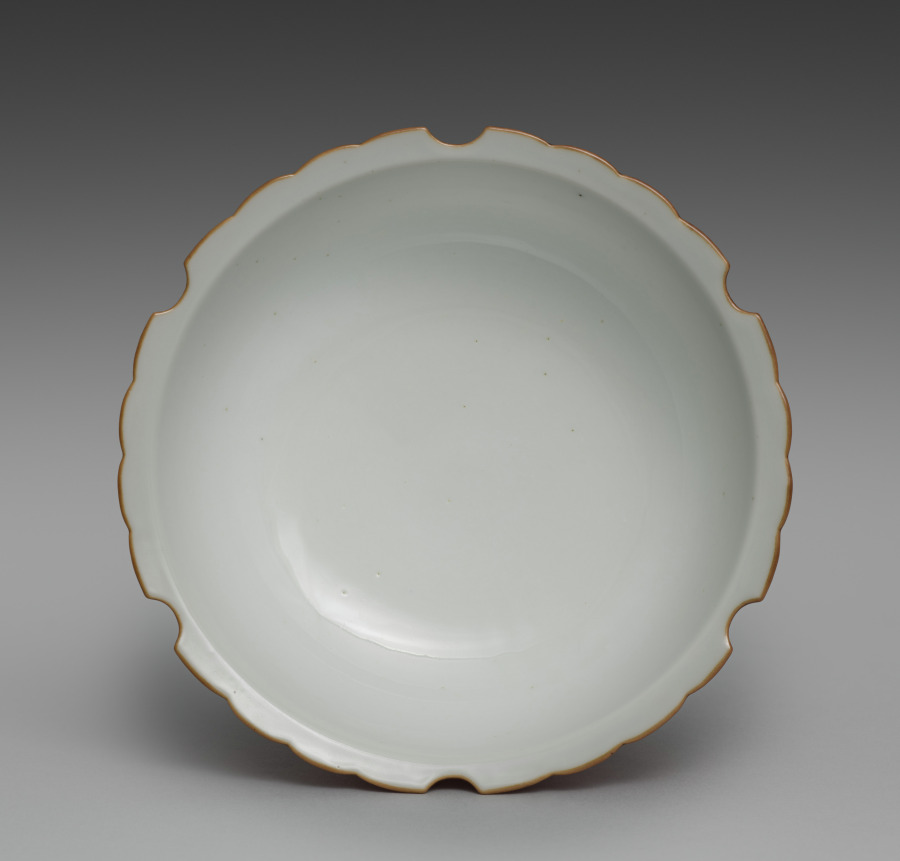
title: Dish from Snow-Flake Side Dishes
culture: Japan, Meiji period (1868–1912)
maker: Seifū Yohei III (Japanese, 1851–1914)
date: 1893–1914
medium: One from a set of six porcelain dishes; porcelain with lobed rims and pink glaze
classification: Ceramic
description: According to the box lid, this set of six side dishes, or mukōzuke, are “snow-flower style” (sekkashiki), having mouths shaped like snowflakes. Their mouths, which have six lobes and scalloped edges, are traced with brown iron oxide at the rim. The outside of each bowl is glazed with a very bright pink over the basin and foot, and the inside is left white. From directly above, one sees a snowflake-like shape, and from the side, they seem to float above a rosy ground.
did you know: The box for this set of dishes has an inscription on the side noting that they were for a person with the family name Nakamoto.